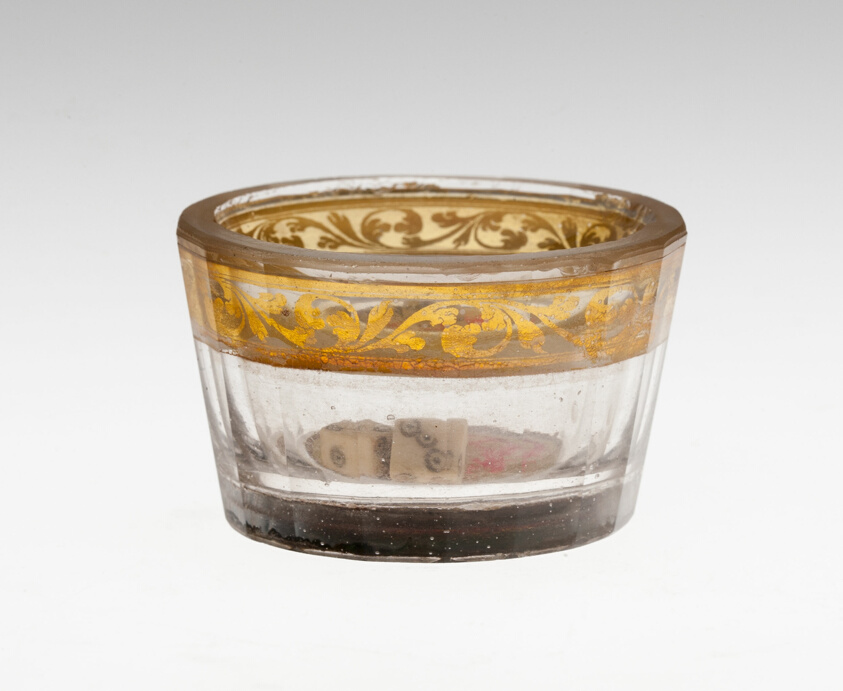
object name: Glass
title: Salt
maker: Bohemia, Czech Republic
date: c. 1730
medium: Glass with engraved gold leaf decoration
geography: Bohemia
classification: glass; european decorative arts